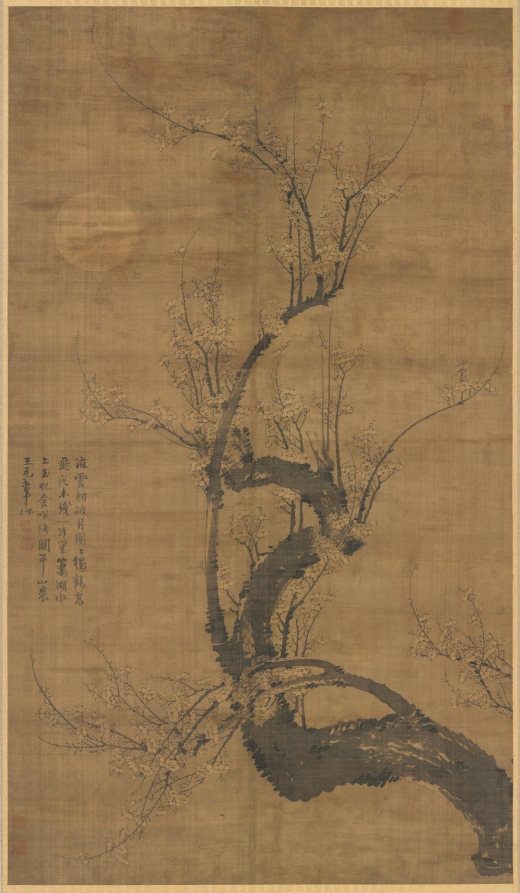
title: A Prunus in the Moonlight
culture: China, Yuan dynasty (1271-1368)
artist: Wang Mian (Chinese, 1287–1359)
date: 1300s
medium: Hanging scroll; ink on silk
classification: Painting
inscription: 8 additional seals: 6 of the Qianlong 乾隆 emperor (r. 1736-95); 2 of Dong Gao 董誥 (1740-1818).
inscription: 海雲初破月團團，獨鶴高飛夜未殘。/ 一片笙簫湖水上，玉妃含笑倚闌干。 王元章作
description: The plum flourishes in the mild climate of the south, and it was not before the Six Dynasties period (220– 589 CE) that the motif began to be appreciated by southern artists, many of whom had emigrated from the north. Wang Mian from Zhejiang province had failed the civil and military service examinations and later rejected appointments under the Mongol government. Instead, he chose to return home, making a living by selling plum paintings. Few of Wang’s works have survived, but they demonstrate that by his time the ink-plum (momei) genre was fully developed.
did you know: The painting portrays the plum in the nighttime, as indicated by the tint of the background and the presence of the moon.